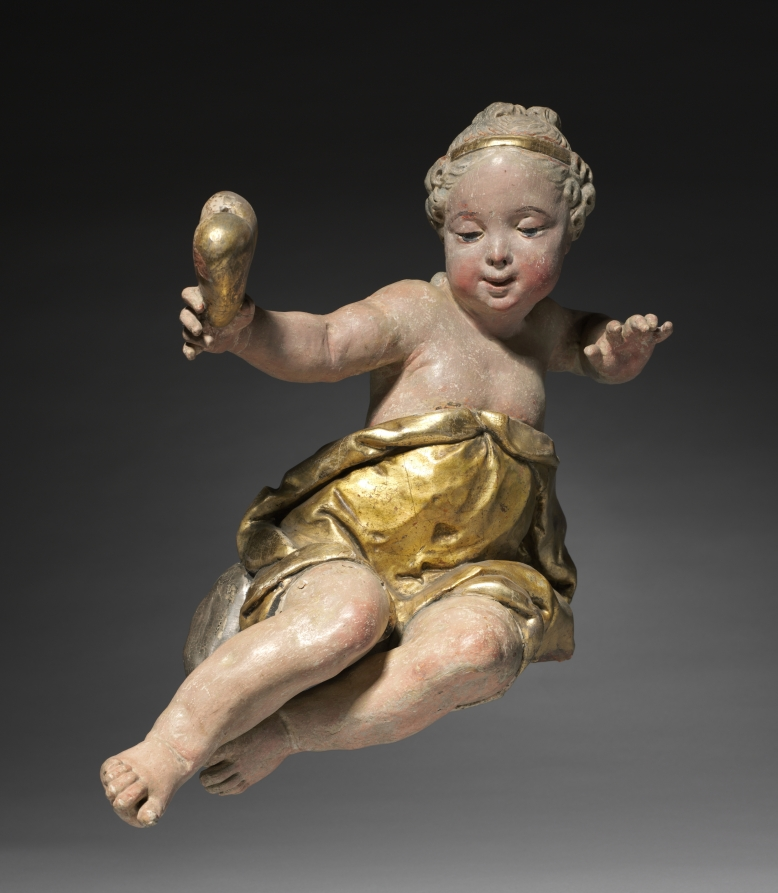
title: Putto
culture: Germany, near Bamberg, 18th century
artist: Ferdinand Tietz (Austrian, 1708–1777)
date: mid-1700s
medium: painted and gilded wood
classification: Sculpture